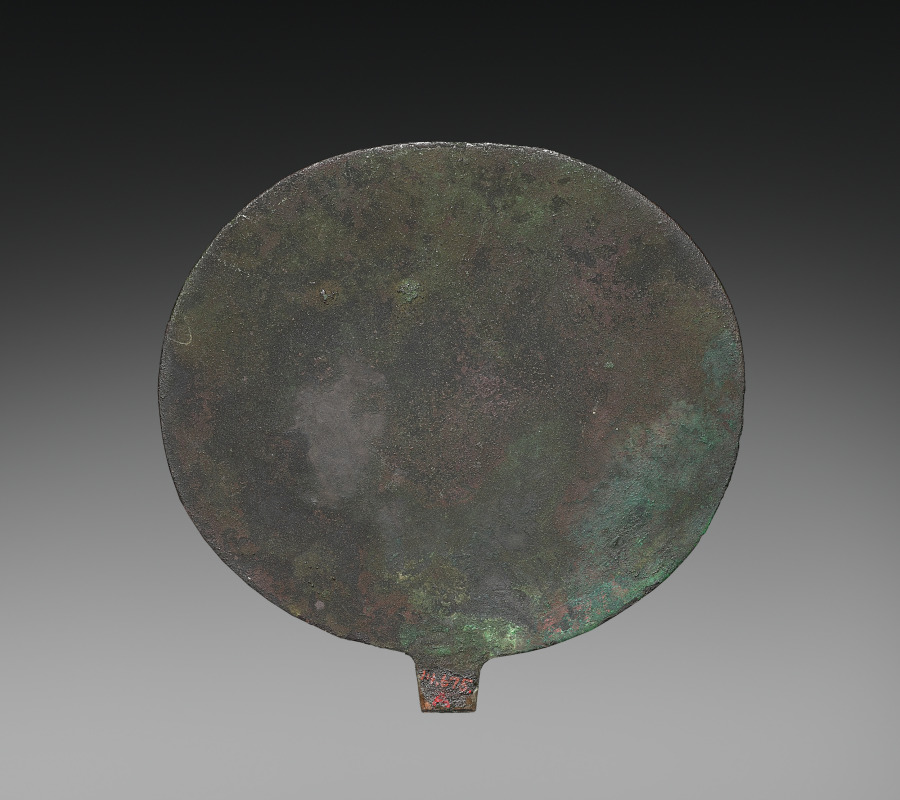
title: Mirror with Falcons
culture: Egypt, New Kingdom (1540–1069 BCE), Dynasty 18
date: 1540–1296 BCE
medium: mirror of copper, handle of tin-bronze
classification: Cosmetic Objects